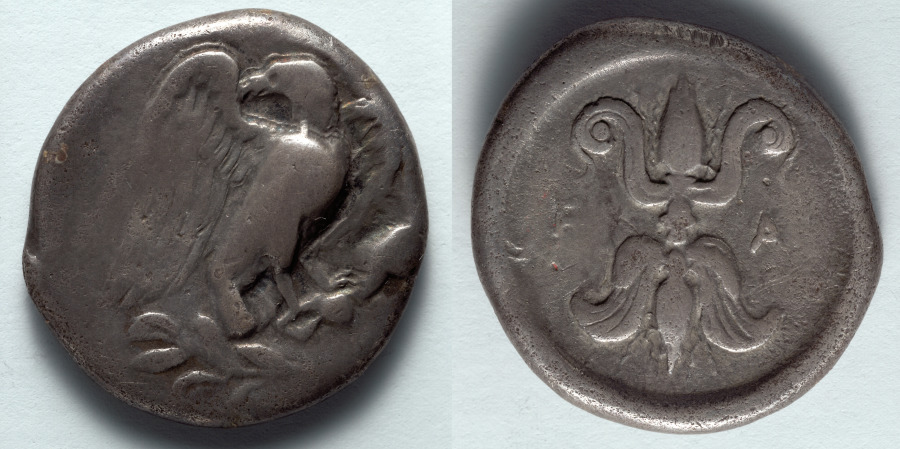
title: Stater: Eagle (obverse); Thunderbolt (reverse)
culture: Greek, minted in Elis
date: c. 432–421 BCE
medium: silver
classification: Coins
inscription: Ϝ | Α